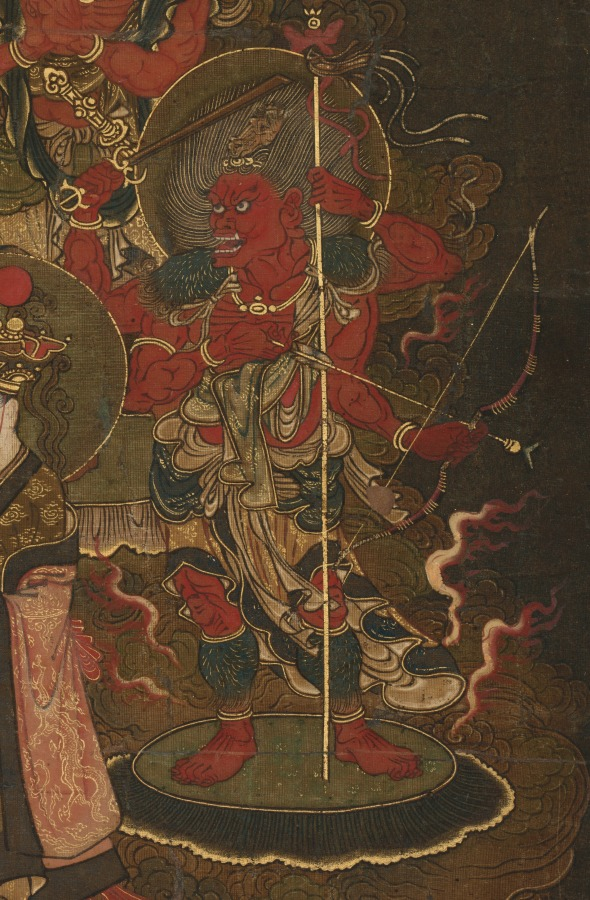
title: Descent of the Nine Luminaries and the Seven Stars at Kasuga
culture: Japan, Nanbokuchō period (1336–92)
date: mid- to late 1300s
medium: Hanging scroll; ink, color, gold and cut gold on silk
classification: Painting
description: This medieval religious painting shows celestial beings descending from the heavens into the Kasuga Shrine, a major religious site in Japan's ancient capital, Nara. The moon and the Kasuga mountain range appear in the uppermost portion of the painting, as does a red shrine entrance gate, or torii. In the upper part of the painting, figural representations of the stars in the constellation known as the Big Dipper in the West descend from right to left on cloud banks. In the lower part, the Nine Luminaries (Sanskrit: Navagraha) that emerged from the Vedic tradition—the sun and moon; the planets Jupiter, Mars, Saturn, Venus, and Mercury; and personifications of the fluctuating lunar nodes—descend in similar fashion. The painting uses the "deities in descent" scheme originating in China, as well as the original Buddhist form mandala (Japanese: honjibutsu mandarazu) format prevalent in medieval Japanese Shinto-Buddhist painting, to generate an image connected to the worship of celestial bodies in Esoteric Buddhism.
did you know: A 19th-century copy of this painting in ink and light color exists at the Kyoto City University of Arts.